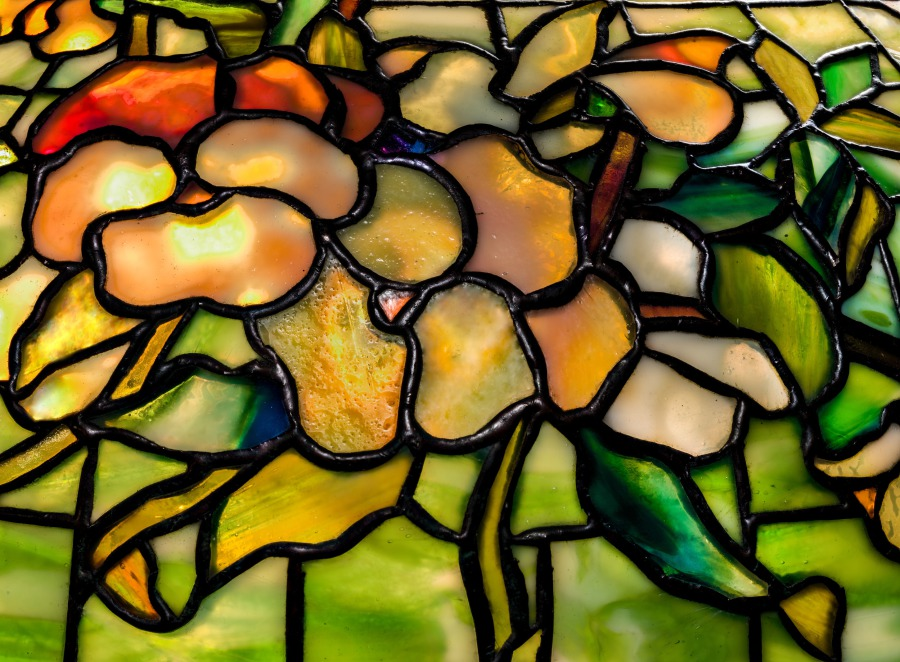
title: Pansy Border Table Lamp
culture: America, New York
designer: probably by Clara Wolcott Driscoll (American, 1861–1944)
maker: Tiffany Studios (United States, New York, 1902–32)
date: c. 1902–10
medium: Leaded glass, blown glass, bronze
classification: Lamp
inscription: mark underside oil reservoir: Tiffany Studios/New York/TGDCo/219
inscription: inside bottom rim of shade: Tiffany Studios New York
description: In the 1870s a renewed emphasis on natural landscapes ushered in a generation of cottage gardeners who delighted in planting perennials in large quantities. Louis Comfort Tiffany was among those who championed the lush, sometimes wild-looking displays of varied floral species in the garden at his Long Island estate, Laurelton Hall. He encouraged his designers to take inspiration from his garden by shipping fresh cuttings almost weekly to his studios. Ohio native Clara Wolcott Driscoll created patterns based on the colorful blooms of spring that became among the most sought after and commercially successful of Tiffany’s production.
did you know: This lamp features a rare base in which green glass is blown into a bronze cage—a very difficult technique since glass and bronze cool at different temperatures risking a complete shatter if not executed correctly.